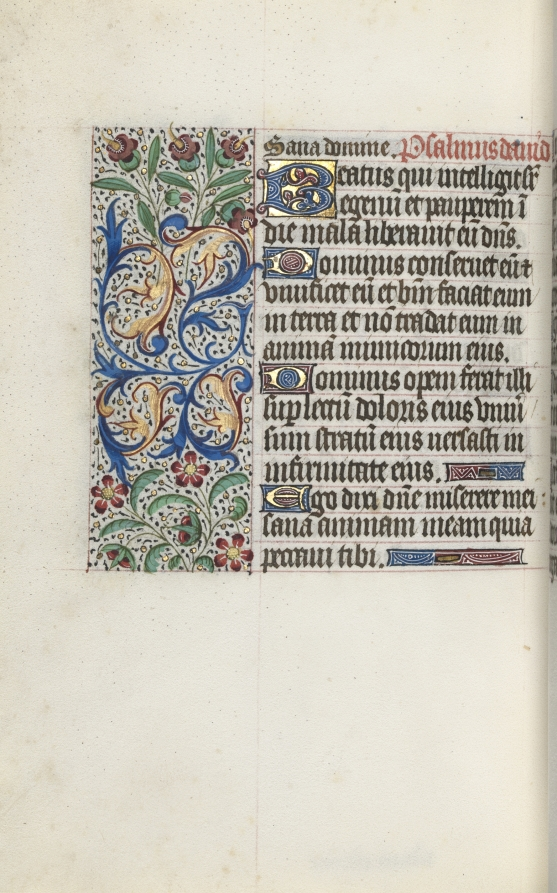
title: Book of Hours (Use of Rouen): fol. 127v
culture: France, Rouen, 15th century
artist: Master of the Geneva Latini (French, active Rouen, 1460–80)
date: c. 1470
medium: ink, tempera, and gold on vellum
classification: Bound Volume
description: In the late 1400s and early 1500s Rouen was an established and important center of book production. The city’s cathedral had a wealthy chapter that spent large sums of money to commission books and to maintain its extensive library. The stationers and booksellers would have likely been concentrated in or near the cathedral precinct. This artist, named after a manuscript now in Geneva, was Rouen’s principal illuminator during the second half of the 1400s.